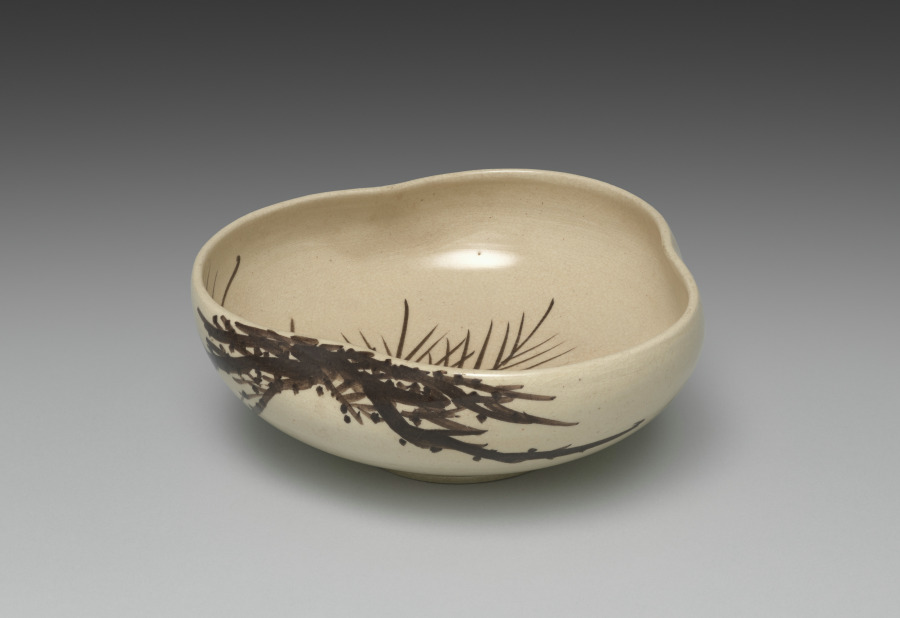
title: Pine-shaped Dish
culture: Japan, Meiji period (1868–1912)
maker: Seifū Yohei III (Japanese, 1851–1914)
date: 1893–1914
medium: Stoneware with underglaze iron oxide and crackled glaze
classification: Ceramic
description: The clever design on this stoneware Awata-style dish makes use of the interior and exterior surfaces to present a close-up view of pine needles on the branch painted in underglaze iron oxide. The branch is shown on the outside of one side of the dish, while the needles fan out across the inside. The entire dish, when seen from above, reveals a shape resembling the mushroom cap–like motif appearing in textile designs and in classical Japanese paintings called Yamato-e to represent pine trees.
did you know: Awata ware, named for the area of Kyoto where it was historically produced, is considered a subset of Kyoto ware. It is characterized by a very light brown body with a transparent crackled glaze.